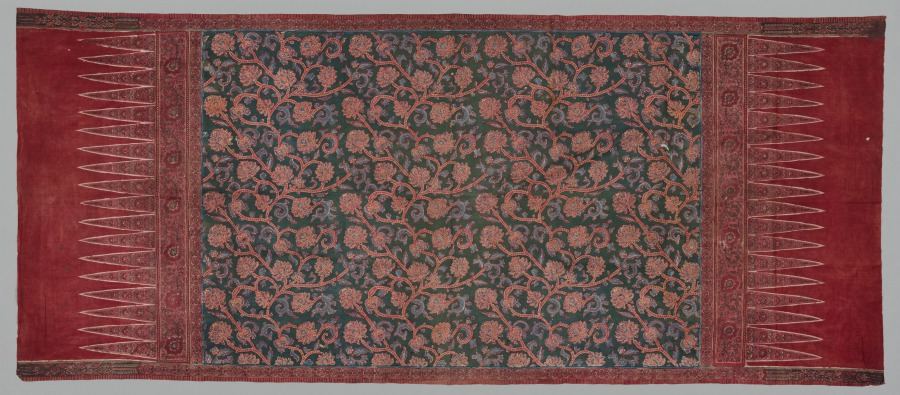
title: Hip Wrapper (tapis)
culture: India, Coromandel Coast, 1st half 19th Century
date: 1800–1850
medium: cotton; plain weave; block printed, drawn resist, painted mordants, dyed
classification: Textile